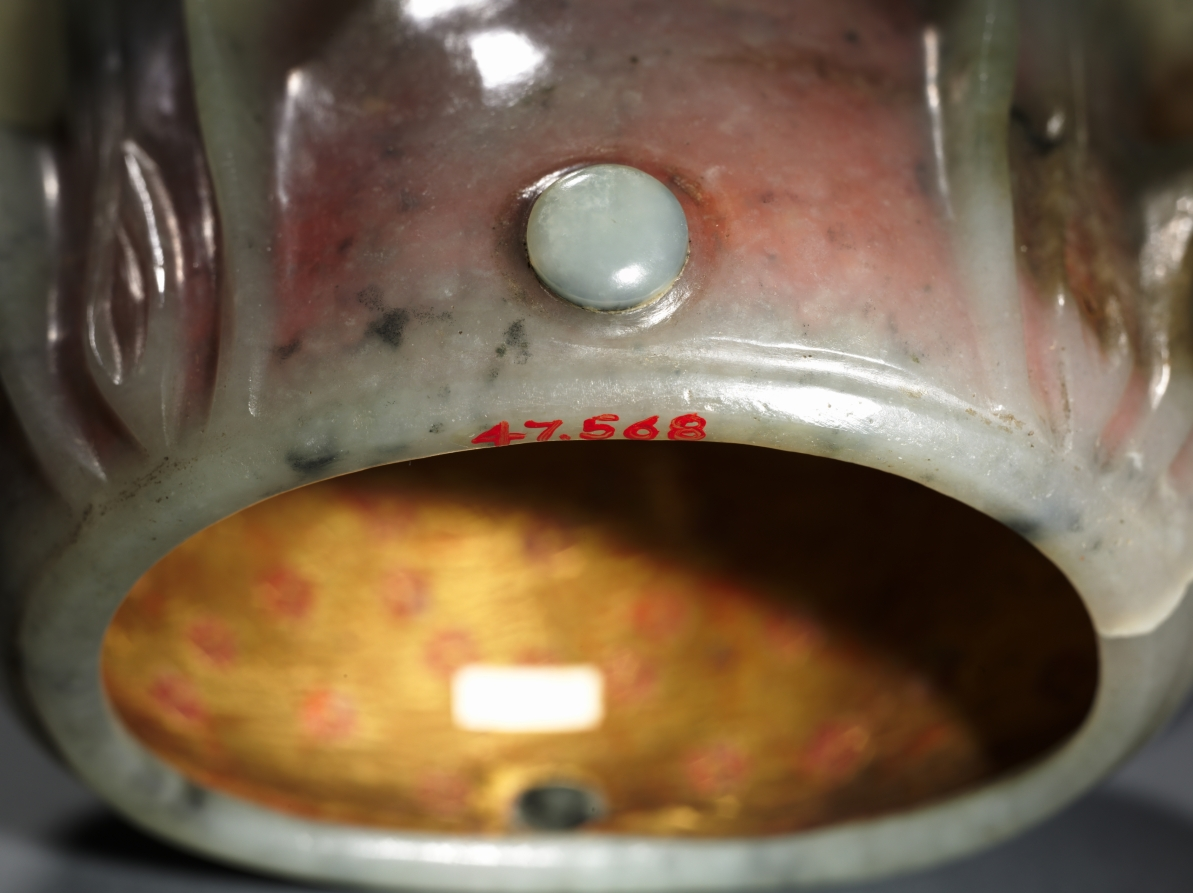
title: Daoist Cap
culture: China, Song dynasty (960-1279) - Yuan dynasty (1271-1368)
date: 960–1279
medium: grayish-green jade with brown and black markings; interior with pink pigment and gold inlays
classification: Jade